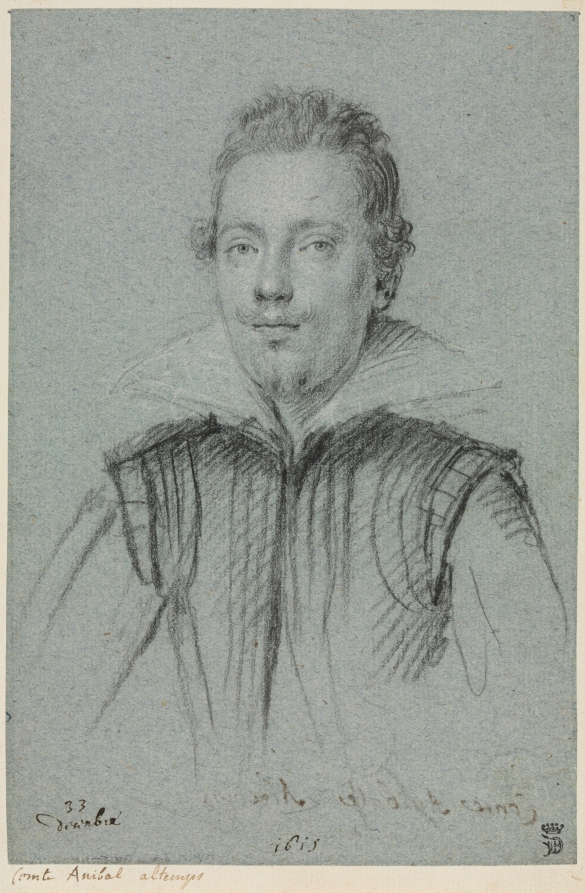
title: Comte Anibal Altemps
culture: Italy, 17th century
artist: Ottavio Mario Leoni (Italian, 1578–1630)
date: 1615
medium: black chalk, heightened with white chalk (stumped in places)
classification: Drawing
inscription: by artist(?), lower left, in brown ink: 33 / dicembre ; by artist(?), lower center, in brown ink: 1615 ; VERSO, lower left and lower center, in brown ink: Comte Anibale Altemps ; RECTO OF SECONDARY SUPPORT, lower left, in brown ink: Comte Anibal altemps